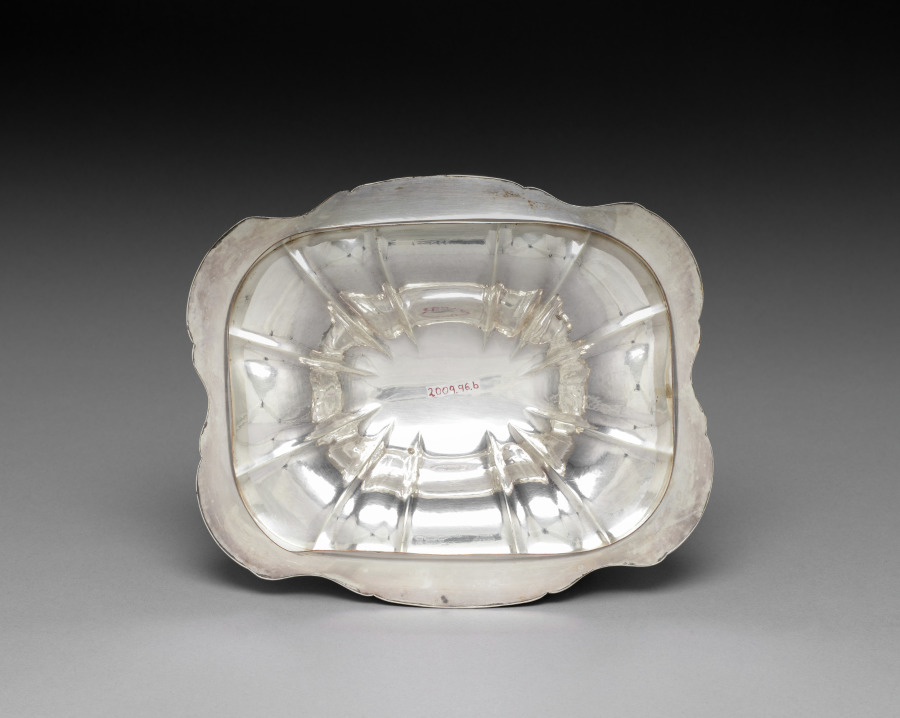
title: Cover for a Tureen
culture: England, Sheffield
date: c. 1830–50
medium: Silver plated on copper (Old Sheffield Plate)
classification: Silver